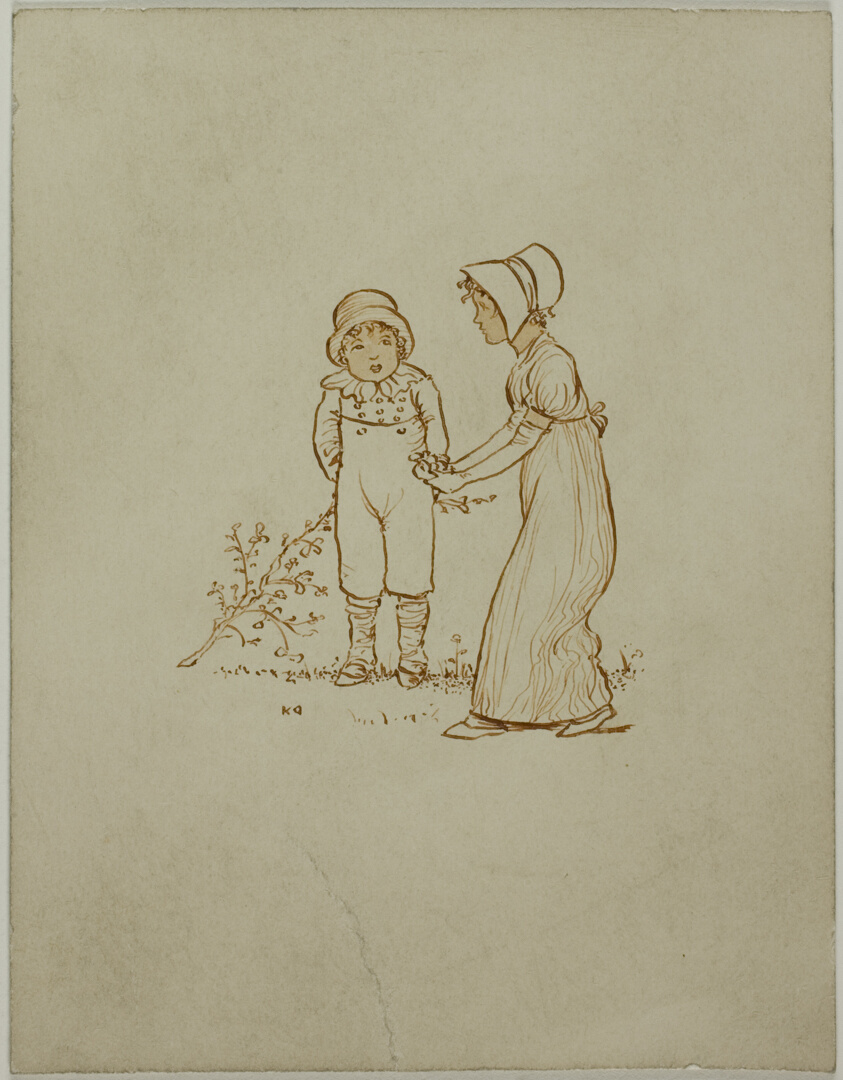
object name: Drawing and Watercolor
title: Little Boy and Girl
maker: Attributed to Kate Greenaway (English, 1846-1901); or an imitator of Kate Greenaway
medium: Pen and red-brown ink, with brush and brown wash, on ivory wove card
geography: England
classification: pen and ink drawings; drawings (visual works); prints and drawing